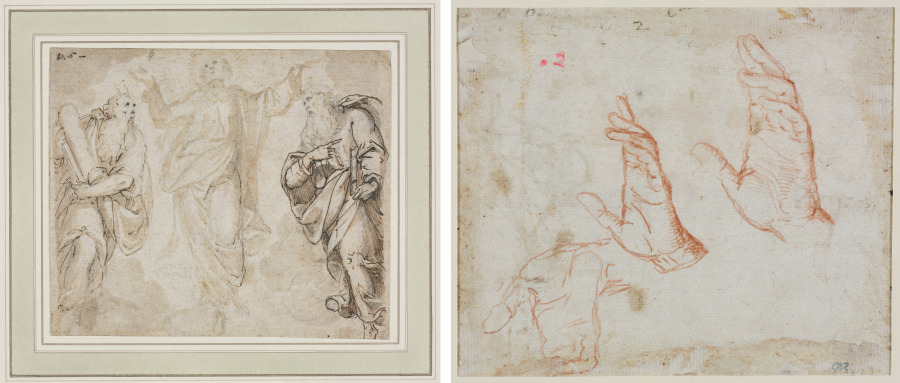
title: The Transfiguration (recto); Study of Hands (verso)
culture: Italy, 16th century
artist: Camillo Procaccini (Italian, 1546–1629)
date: c. 1590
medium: pen and brown ink and graphite and brush and brown wash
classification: Drawing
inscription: recto: upper left, in brown ink: D. 5 - verso: upper center, in brown ink: [illegible, cropped] / 2 ; upper left, in graphite: by Pr[illegible]Ni ; upper left, in pink pencil: .2 ; lower right, in graphite: [STAT?] ; SECONDARY SUPPORT, lower right, in graphite: 00265[2?] [cropped]